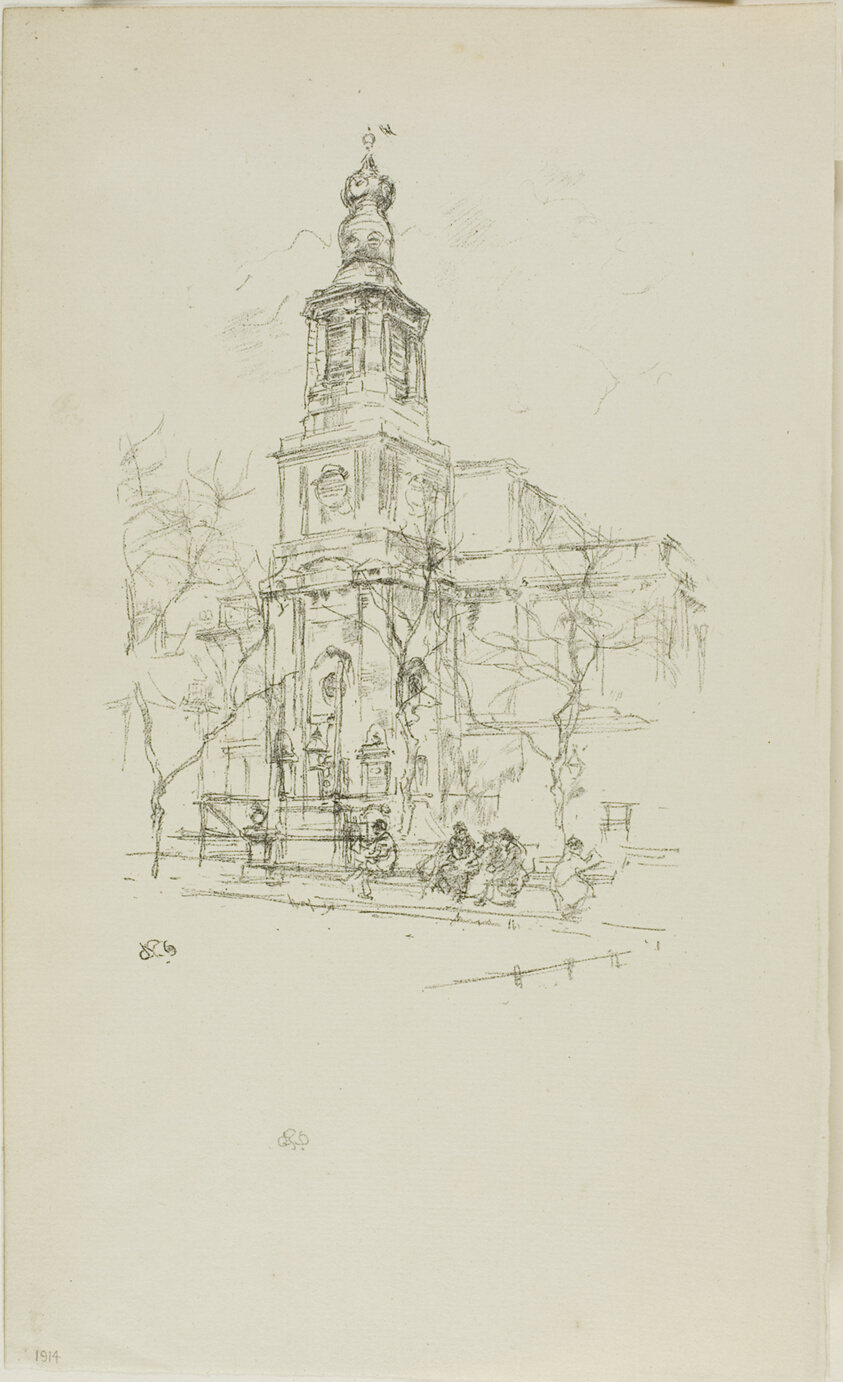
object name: Print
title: St. Anne's, Soho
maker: James McNeill Whistler (American, 1834-1903)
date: 1896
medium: Transfer lithograph in black on ivory laid paper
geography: United States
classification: transfer lithograph; lithograph; print; prints and drawing; paper